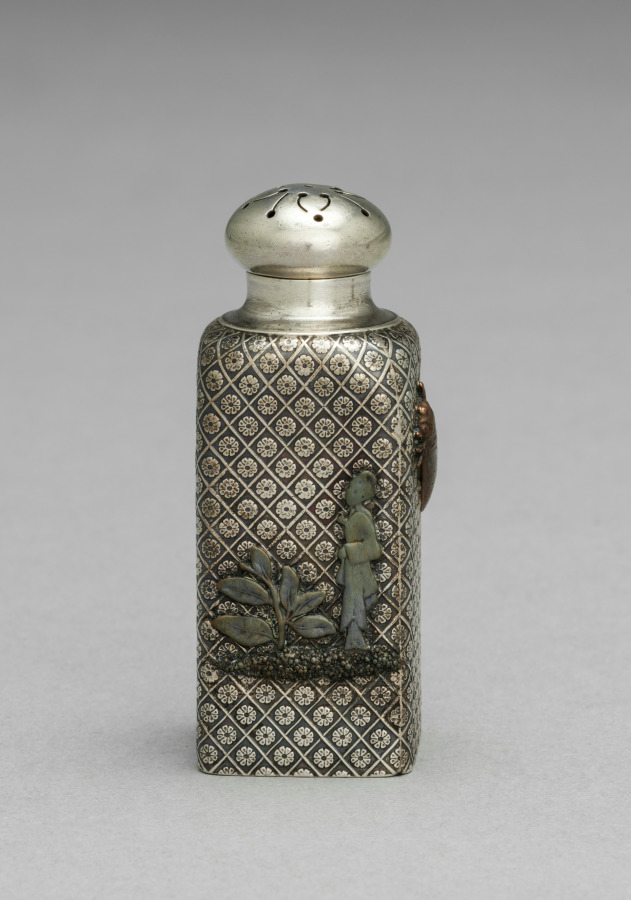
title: Salt Shaker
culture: America, Rhode Island, Providence, 19th century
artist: Gorham Manufacturing Company (America, est. 1831)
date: c.1875–1885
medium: silver and mixed metals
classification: Silver